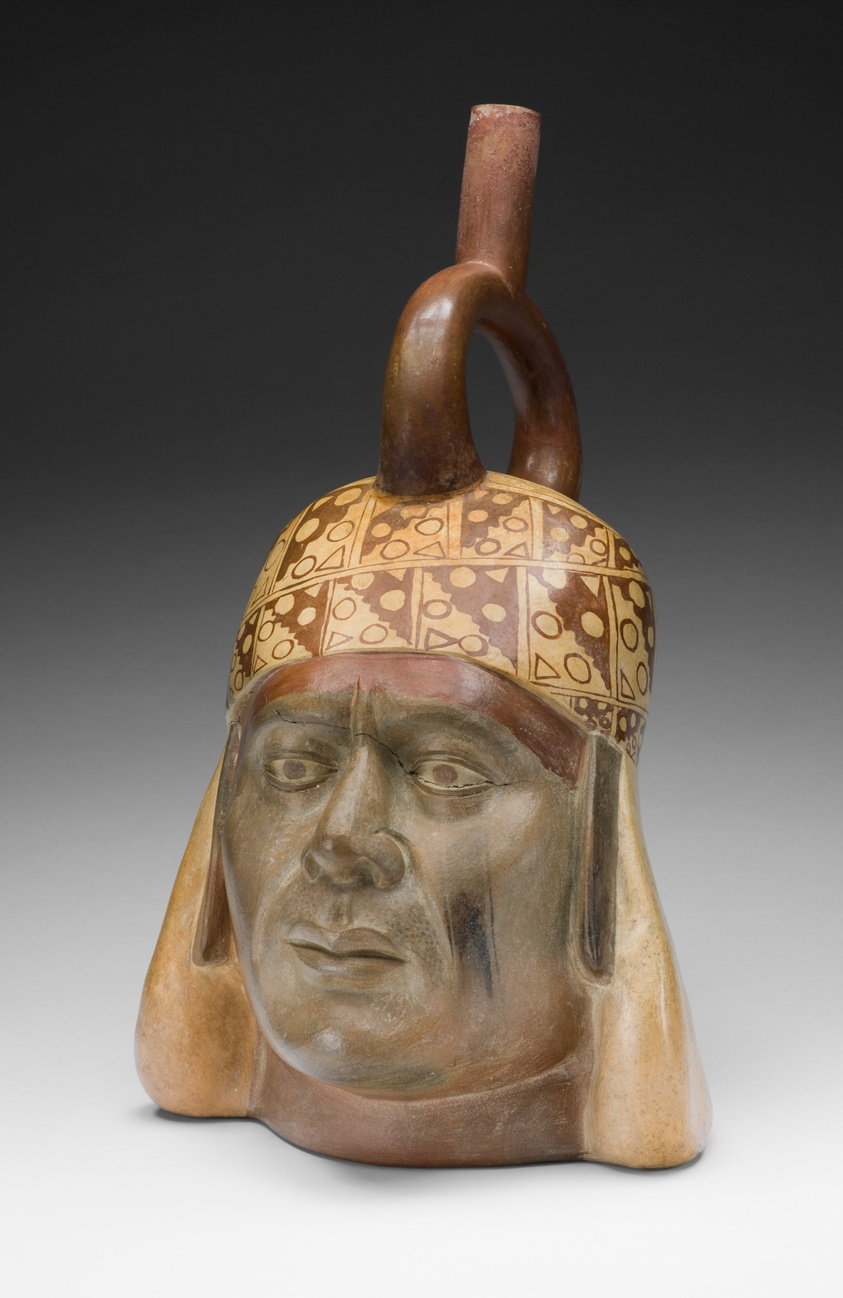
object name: Vessel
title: Portrait Vessel of a Ruler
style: moche, mochica v, mochica, early intermediate period, Pre-Columbian, americas, andes, Arts of the Americas, andean, south american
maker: Moche (North coast, Peru)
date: 100 BCE–500 CE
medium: Ceramic and pigment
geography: Peruvian North Coast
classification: ceramics; earthenware; art of the americas; vessel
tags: people, men, indigenous, red (color), geometric, heads, headwear, portraits, headdresses, rulers (people)